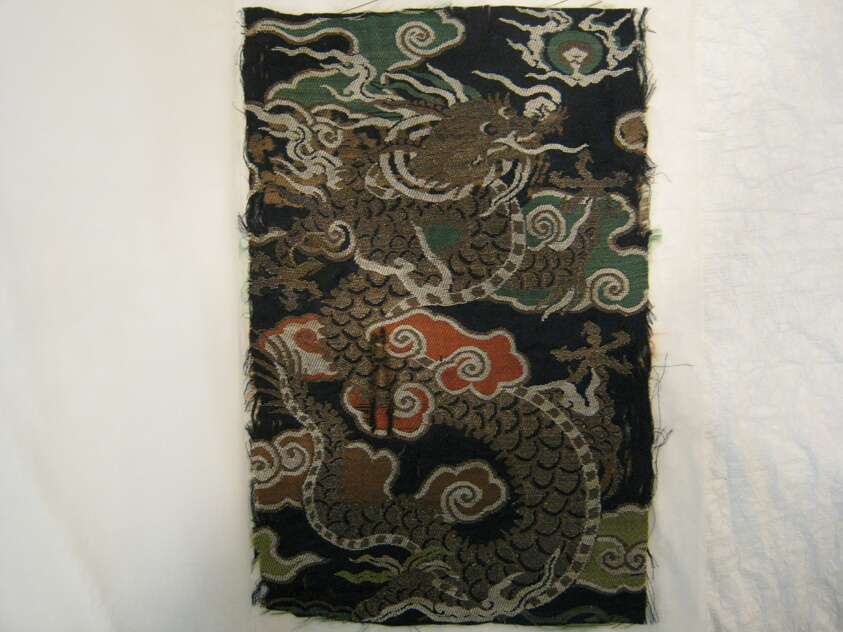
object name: Textile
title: Fragment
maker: Japan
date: Edo period (1615–1868), 1775/1800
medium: Brocaded plain compound satin, silk and gilt paper wound on white cotton core & brown (lacquered?) paper; 2 strips to m.m.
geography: Japan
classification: textile; weaving